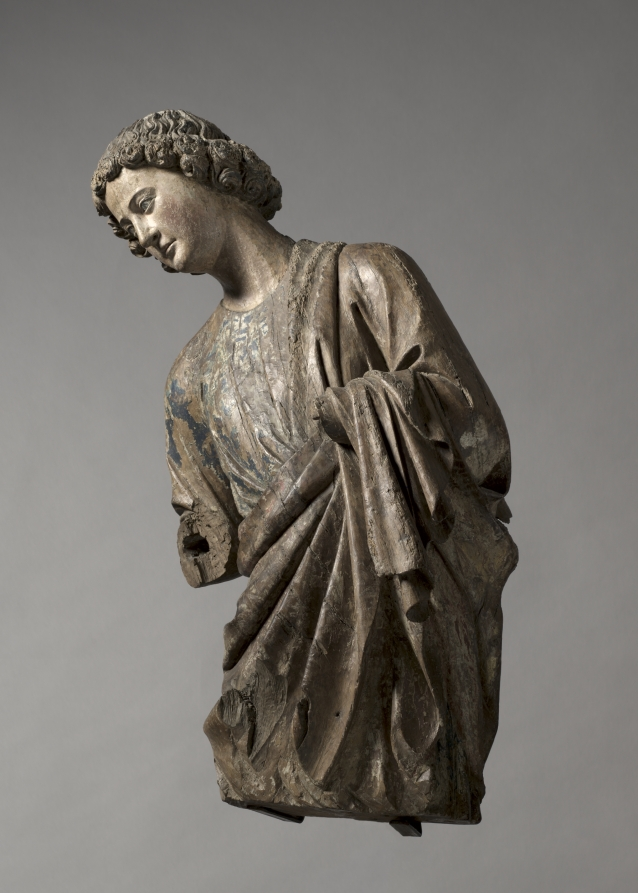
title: Angel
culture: France, vicinity of Reims, 13th century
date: c. 1250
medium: walnut with traces of gilding and polychromy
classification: Sculpture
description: Surviving in fragmentary condition, this pair of angels lacks lower arms, hands, wings, and attributes. Their original paint and gilding, now almost entirely lost, once rendered their garments a rich brocade and their hair a luxuriant gold. Nonetheless, in their graceful poses and sublime faces—which may portray tragic interest, anguish, or deep concern—their original delicacy and power are still evident. They embody the monumental style of 13th-century High Gothic cathedral sculpture in France. Their style specifically suggests they were carved in or around Reims, possibly by sculptors associated with the cathedral there. Their original placement is unknown, but they may have flanked an altar on columns.